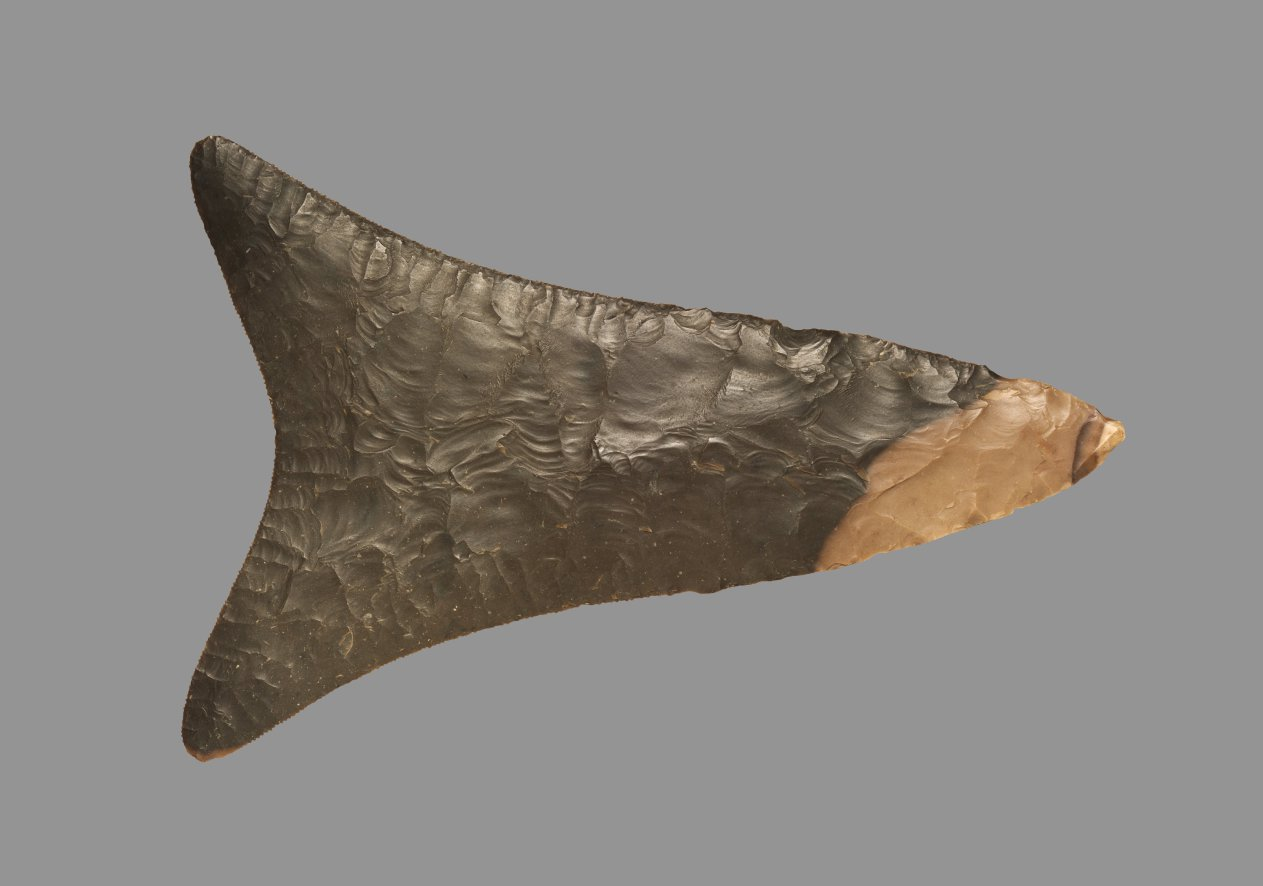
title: Fishtail Knife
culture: Egypt, Predynastic (5000–2950 BCE), Naqada Ia–IIa (3900–3300 BCE)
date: 4500–4000 BCE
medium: dark brown- to dark green-colored flint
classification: Implements